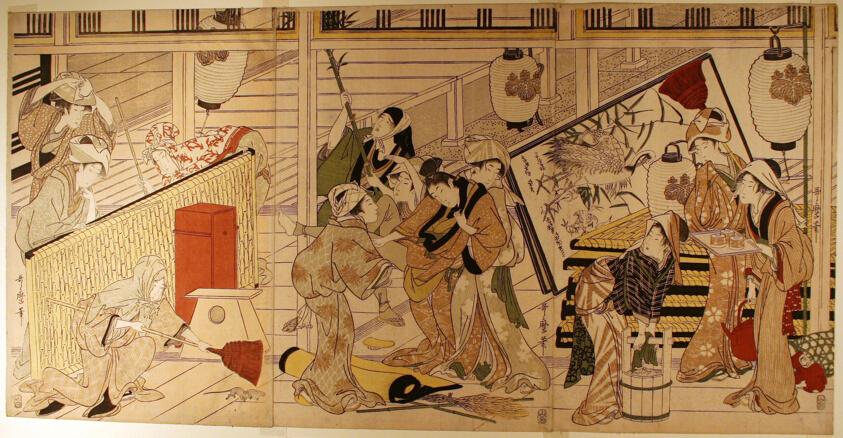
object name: Print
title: House cleaning in preparation for the New Year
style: Japanese (culture or style)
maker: Kitagawa Utamaro 喜多川 歌麿; Japanese, 1753 (?)-1806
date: late 1790s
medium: Color woodblock print; three left sheets of oban pentaptych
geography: Japan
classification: woodblock print; print; asian art